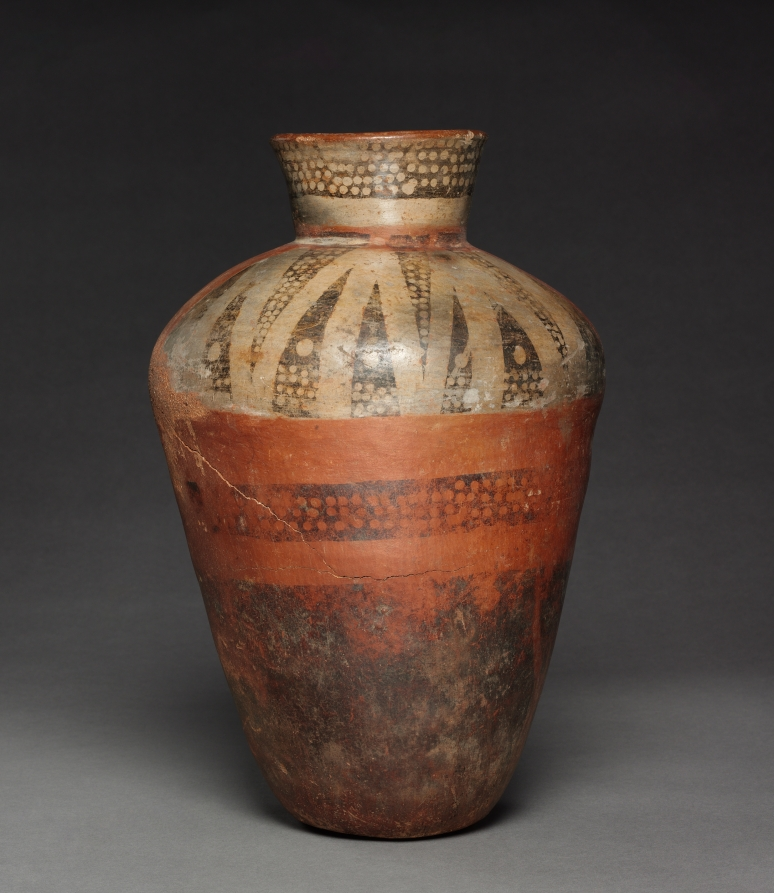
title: Vase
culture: Colombia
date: 1000–1550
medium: pottery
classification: Ceramic